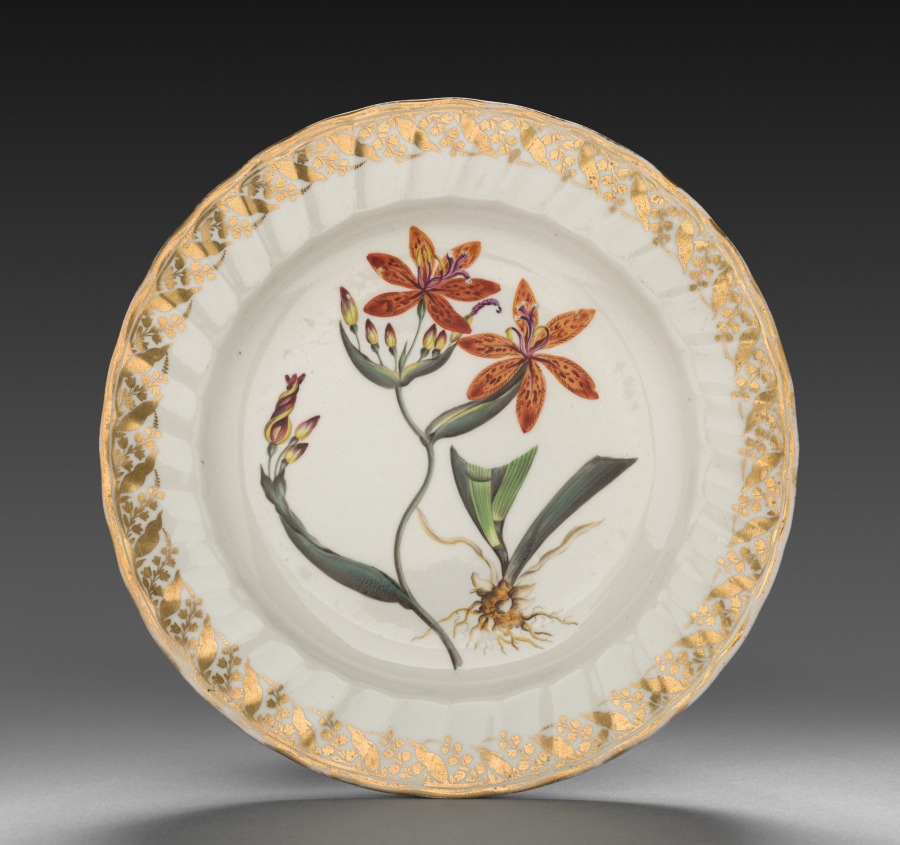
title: Plate from Dessert Service: Chinese Ixia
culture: England, Derby, 18th century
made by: Derby (Crown Derby Period) (British)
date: c. 1800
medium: porcelain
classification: Ceramic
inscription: inscribed in blue on back: Ixia Chinensis./Chinese Ixia./crown/crossed batons and dots/D/115.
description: Each dish is decorated with recognizable plants, the names of which are inscribed on the base in both Latin and English. Identifying the blossoms only became customary in the late 18th century when a single piece of porcelain was decorated with one species, and flowers were represented along with leaves, stems, seed pods, and roots. All of this reflects Carolus Linnaeus’s recent invention of a scientific method to categorize all known flora. The decorations on the Derby factory’s products derive from contemporary English botanical publications. For instance, illustrations in William Curtis’s The Botanical Magazine served as models for the French marigold and nettle leaved bell flower on the dessert service.